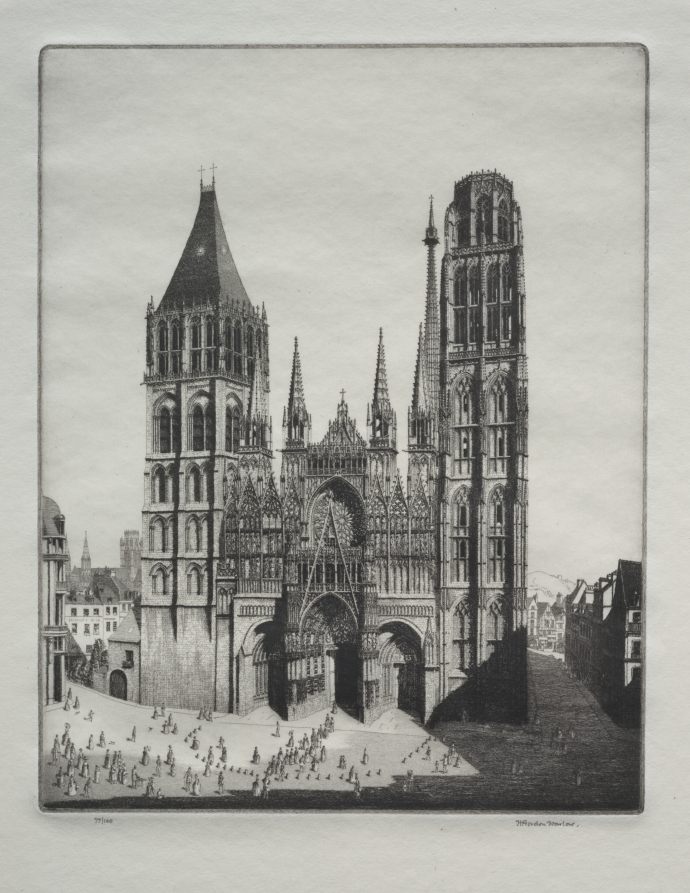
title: Rouen Cathedral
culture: England, 20th century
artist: Herbert Gordon Warlow (British, 1885–1942)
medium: drypoint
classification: Print